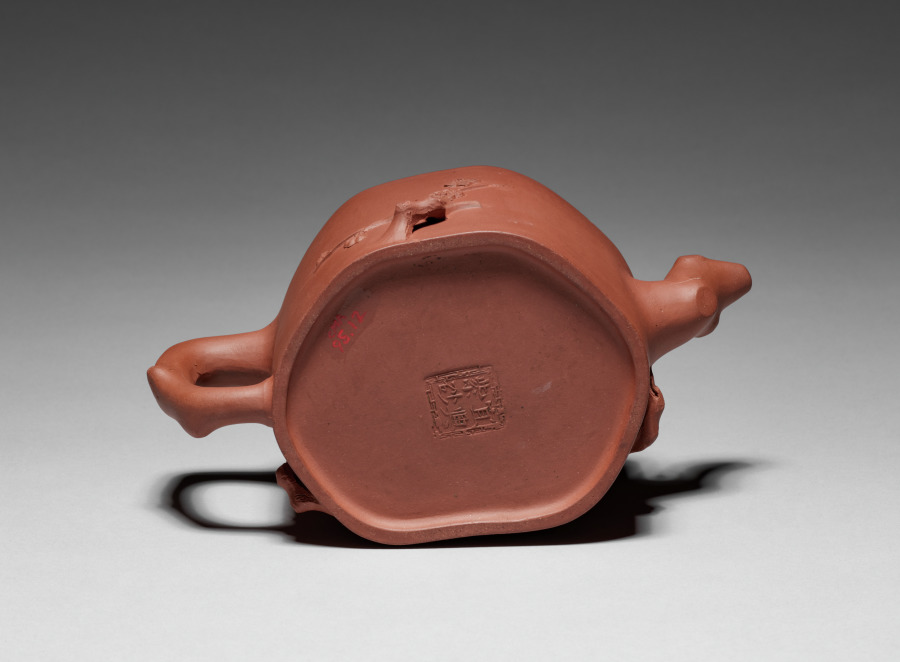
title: Yixing Teapot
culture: China, Qing dynasty (1644-1911)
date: 1800s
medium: stoneware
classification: Ceramic